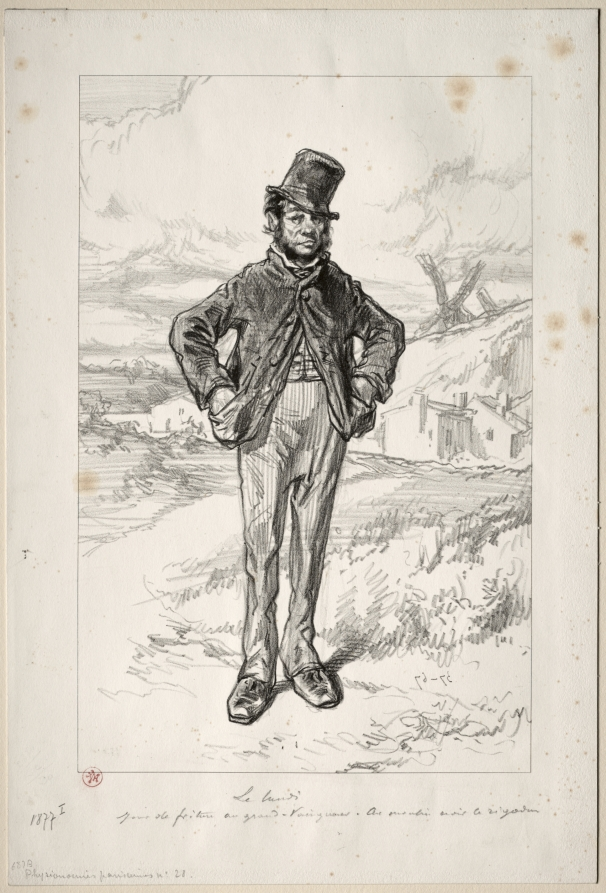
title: Physionomies Parisiennes: Le Lundi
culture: France, 19th century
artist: Paul Gavarni (French, 1804–1866)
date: 1857–58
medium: lithograph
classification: Print